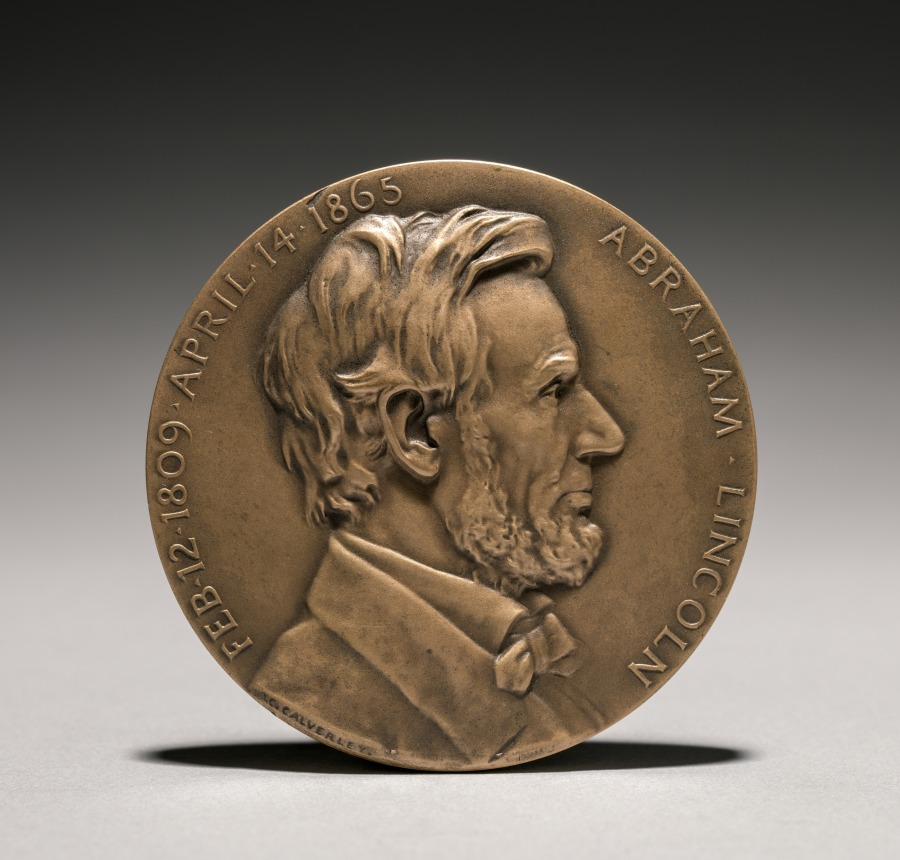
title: Abraham Lincoln Medal (obverse)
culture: America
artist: Charles Calverley (American, 1833–1914)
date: 1900s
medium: bronze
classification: Metalwork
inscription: right-hand side: "FEB.12.1809 APRIL.14.1865"; left-hand side: "ABRAHAM LINCOLN." Below: "C. Calverley."